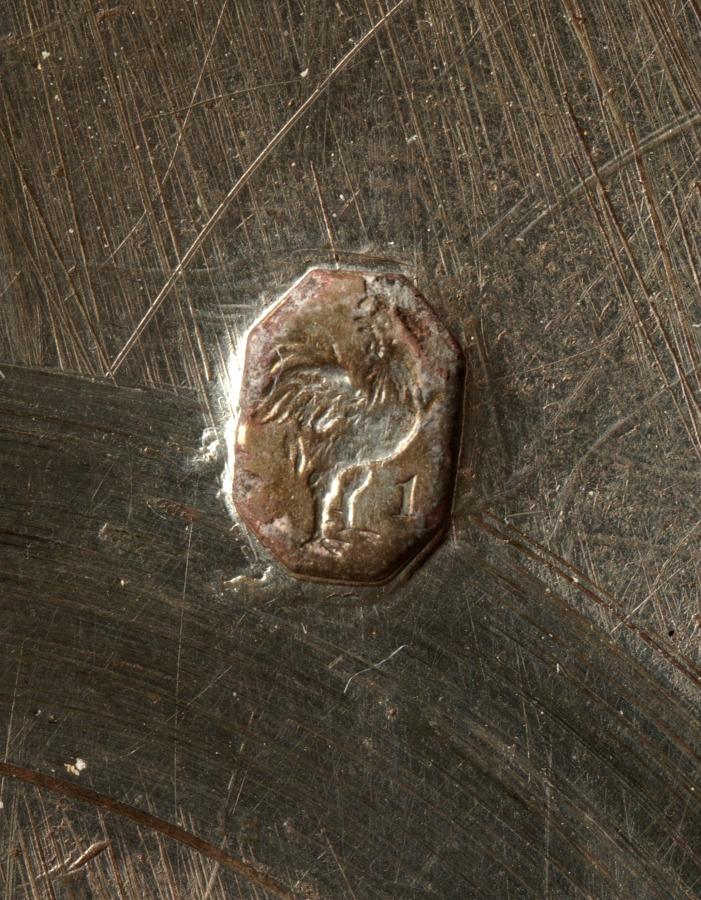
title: Covered Tureen on Stand (Pot à oille)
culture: France, late 18th-early 19th Century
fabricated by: Henry Auguste (French, 1759–1816)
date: 1797–98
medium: silver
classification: Silver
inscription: [Coat-of-arms of Amoral don Federico Carlos Gravina on bowl; cover; stand]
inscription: [Assay mark for large-sized work, 1798-1809, lining exterior; tureen foot exterior]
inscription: [Assay mark for medium-sized work, 1798-1809, beneath stand foot; on edge of cover]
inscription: [Maker's mark of Henri Auguste, master silversmith in 1785, beneath tureen foot; beneath stand foot; inside stand foot edge]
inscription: [Official assay mark for first standard silver, Paris, 1798-1809, beneath stand foot; lining exterior; on cover]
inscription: [Official mark for silver imported from countries with customs conventions, 1838-1912, beneath stand foot; edge of cover; tureen lip exterior; lining exterior; on one tureen handle; outside stand foot; tureen foot exterior]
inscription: [Unknown mark, possibly Ceres' profile in square with "E" and "7", beneath stand foot; on cover; rim of lining; tureen foot exterior; tureen lip exterior]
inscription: [Unofficial assay mark for first standard silver, Paris, 1794-1797, beneath foot stand; beneath tureen foot; near tureen handle exterior]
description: This pot-à-oille was designed by master goldsmith Henri Auguste after drawings by draftsman and sculptor Jean Guillaume Moitte. Though many of the neoclassical decorative elements on this piece are pulled from Moitte’s design, Auguste’s final product leaves out much of the proposed ornamentation. Instead this object finds distinction in its large size and smooth expanses of silver that emphasize the purity of its lines.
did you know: The coat of arms on the body of the work corresponds to the family of Federico Carlos Gravina, a Sicilian-Spanish admiral who was known to have had a close diplomatic relationship with Napoleon I.